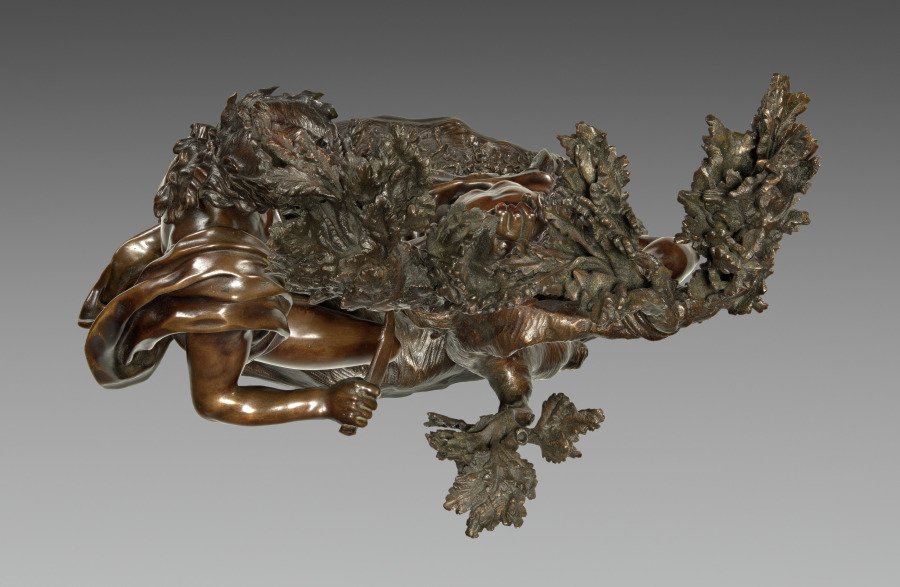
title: Apollo Flaying Marsyas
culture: Italy, Florence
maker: Giovanni Battista Foggini (Italian, 1652–1725)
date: c. 1691–1700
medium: Bronze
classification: Sculpture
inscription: 1136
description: According to myth, the overconfident satyr (half-goat, half-man) Marsyas challenged Apollo, god of the arts, to a musical duel. The defeated Marsyas was tied to a tree and skinned alive in punishment for his pride. Foggini’s bronze captures the moment after Apollo’s victory as the bound Marsyas cries out in agony while the god makes the first incision. The satyr’s anguish is echoed by the gnarled branches; Apollo’s wrath is manifested in his billowing drapery.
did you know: The lyre with which Apollo outperformed Marsyas can be seen between his feet, cast down upon his victory.